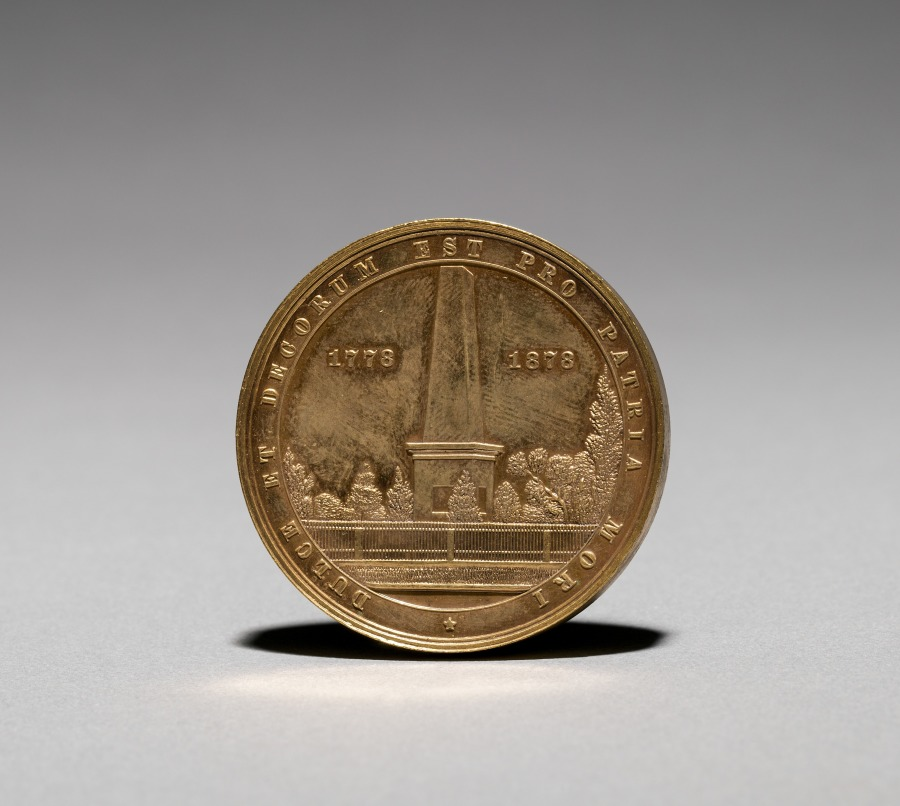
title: Medal: In Commemoration of the Battle and Massacre of Wyoming, 3 July 1778 (reverse)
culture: America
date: 1878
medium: gilt bronze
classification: Metalwork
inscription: Dulce et. decorum est pro patria mori 1778-1878.